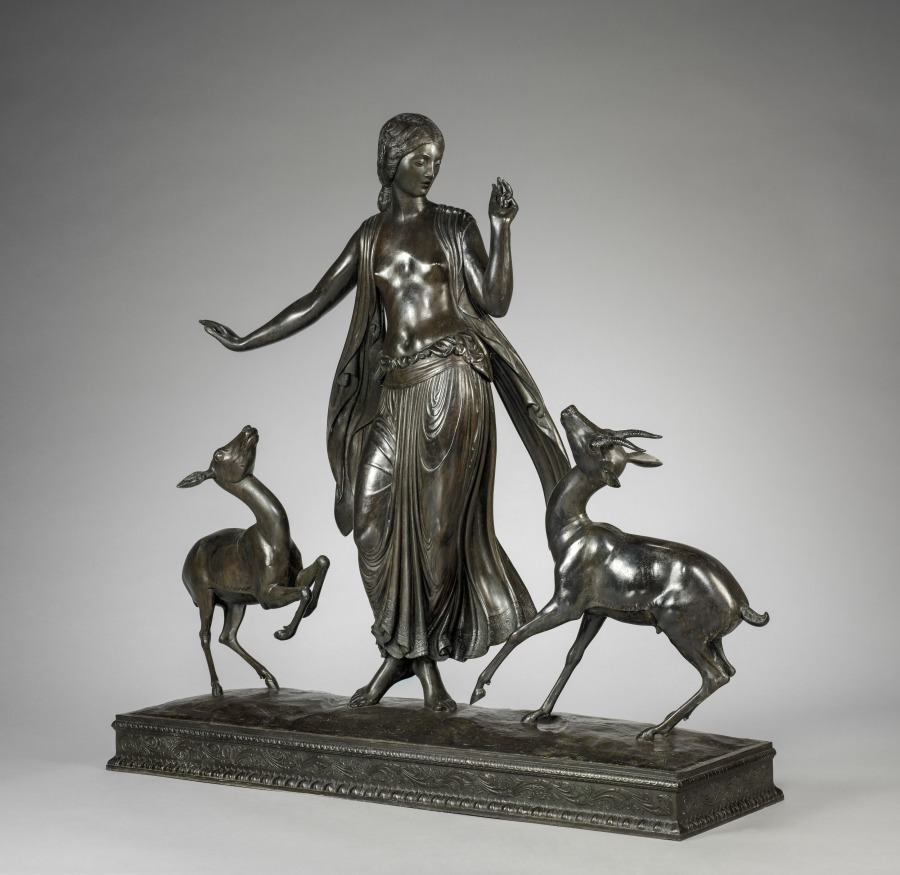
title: Dancer and Gazelles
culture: America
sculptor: Paul Manship (American, 1885–1966)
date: 1916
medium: bronze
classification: Sculpture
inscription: Signed on base: PAUL MANSHIP © 1916.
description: One of Manship’s most popular compositions, this work established his reputation as an important up-and-coming sculptor. Here, his mastery of elegant silhouette is manifest through the gracefully posed dancer and her sleek animal companions. Stylized decorative patterning embellishes the dancer’s hair and swaying skirt.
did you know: Initially interested in painting, Manship opted to pursue sculpture after discovering he had color vision deficiency.